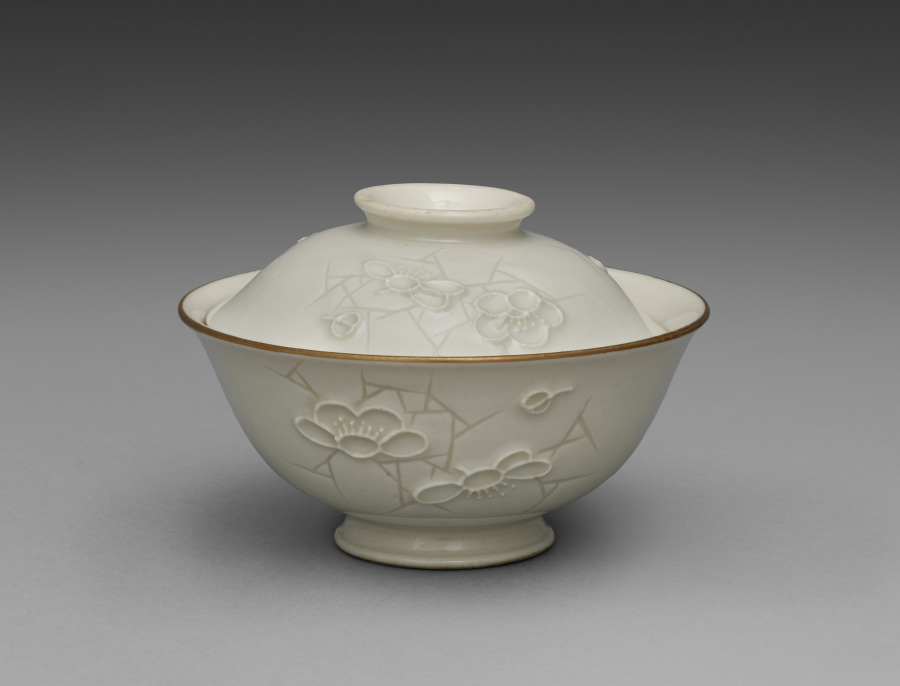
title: Covered Bowl from Dining Set with Plum Blossoms and Cracked-Ice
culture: Japan, Meiji period (1868–1912)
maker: Seifū Yohei II (Japanese, 1844–1878)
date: c. 1875–78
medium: Porcelain with molded designs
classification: Ceramic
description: Each item in this set has a delicate low-relief design of flowering plum branches over scattered, intersecting lines meant to resemble the cracked-ice surface of a frozen body of water and is signed on the base in gold pigment. While Yohei II produced many fine works in underglaze blue, like those produced by Kiyomizu Shichibei, he also made works in quite different styles later in his career, from the early 1870 s. In 1873, he was appointed purveyor to the Industrial Center of Kyoto Prefecture, a designation associated with Kyoto’s efforts to reach an international market through the port of Kobe; and from 1875 until his death, he was involved in national-level projects to present Japanese ceramics across the world. It was during this period that Yohei III was apprenticed to Yohei II, and it has been suggested that this set may in fact be an early example of Yohei III’s work, which he signed with his teacher’s name. Decorated with flowers resembling Japanese textile motifs, the set calls to mind the design of Yohei II’s pair of vases with plum blossoms in the Victoria and Albert Museum. Here, the elaborate trees created for a formal public exhibition setting have been translated into the approachable blossoms of the genteel domestic environment. While the designs are consistent across the pieces, each raised flower petal and pistil and each incised line in the ice was done by hand, so the cups, bowls, and dishes are similar yet unique. The bottoms of two boxes once identified the set’s owner, but the information has been deliberately obscured with black ink. However, inscriptions still visible appear to indicate two occasions, once at the end of July 1886 , and once again in June 1916 , when parts of the set were requested from Hokura in Niigata Prefecture. The location corresponds to a neighborhood in the present-day city of Jōetsu. The surname Tsuji 辻 also appears on a paper tag affixed to one of the box cloths. Future research may possibly reveal more about their provenance. A vase by Yohei III in a private collection combines the formal grandeur of the Yohei II vases in the Victoria and Albert Museum with the gentler design of this dining set, placing flowering plum trees against soft, scalloped-edge clouds resembling those in golden screens.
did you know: The dining wares have a creamy white coloration that the four boxes containing them identify as Korean in style.